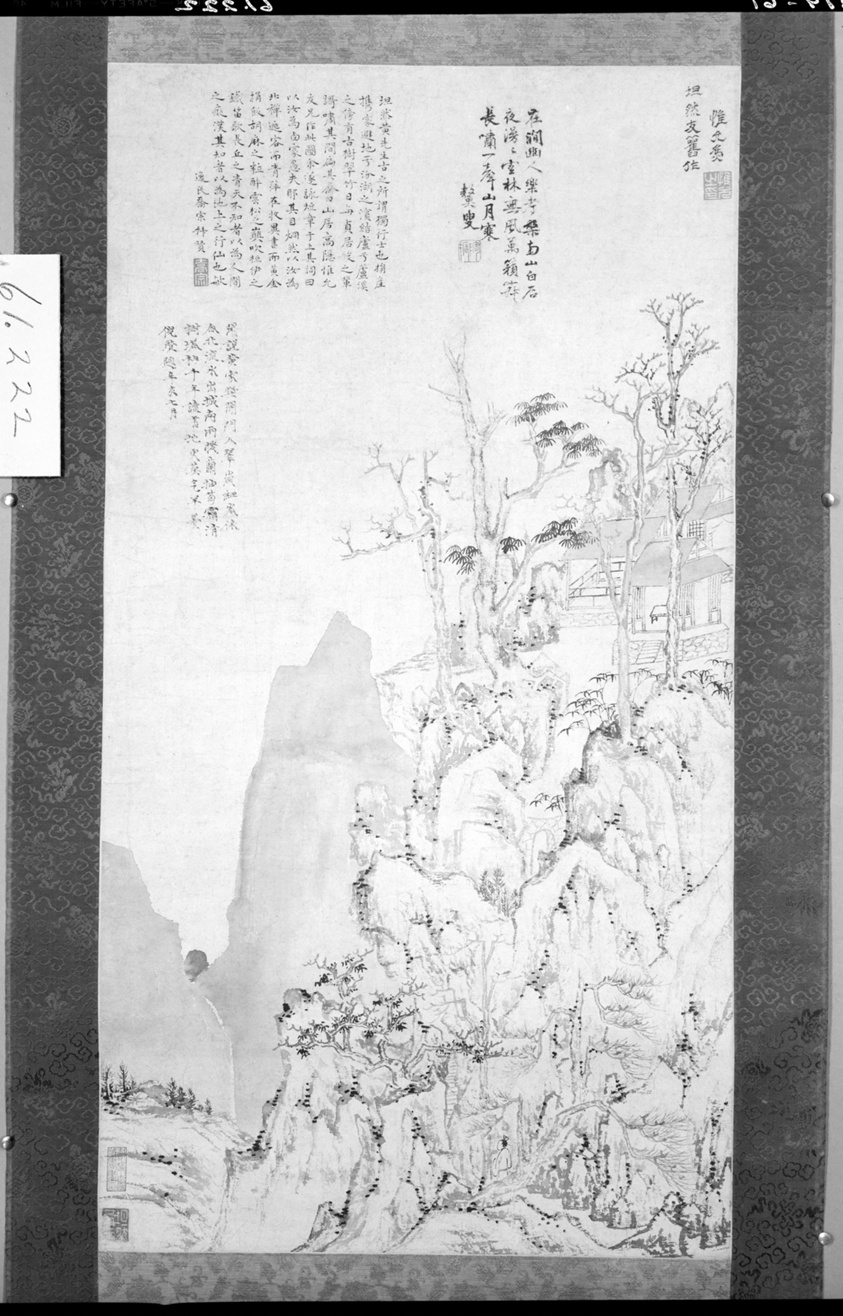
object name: Painting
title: Noble Hermit in a Mountain Retreat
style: Chinese (culture or style)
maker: Chen Ruyan (attributed); Chinese, fl. 1340-1380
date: late Ming/early Qing dynasty, 17th century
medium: Hanging scroll; ink on paper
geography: China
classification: hanging scroll; painting; asian art